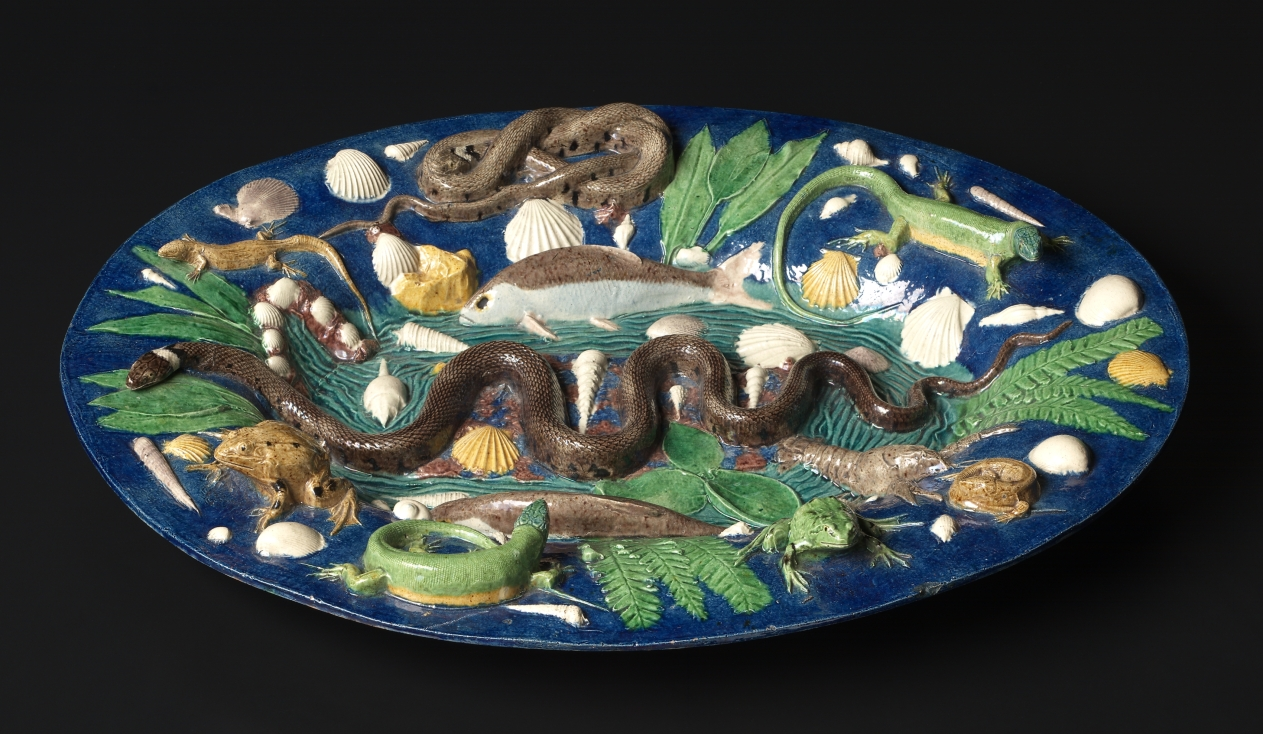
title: Platter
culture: France, 16th century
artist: circle of Bernard Palissy (French, 1510–1589)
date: late 1500s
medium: lead-glazed earthenware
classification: Ceramic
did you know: Coiled snakes, slinking lizards, and scaly fish adorn this decorative platter. Some of the naturalistic details were formed using casts of real animals.